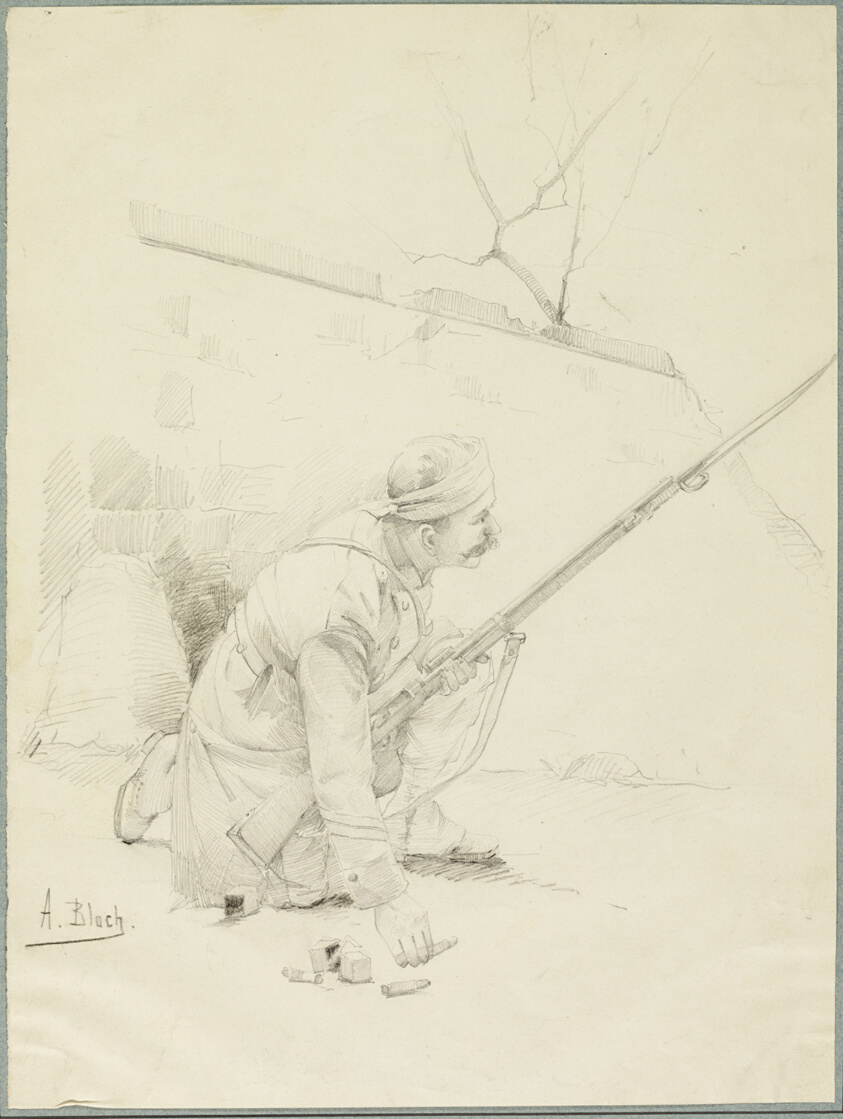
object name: Drawing and Watercolor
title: Wounded Soldier Loading his Rifle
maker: Alexandre Bloch (French, died 1914/21)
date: c. 1897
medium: Graphite, with black crayon, on ivory wove paper, tipped onto blue wove card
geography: France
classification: graphite; drawings (visual works); prints and drawing